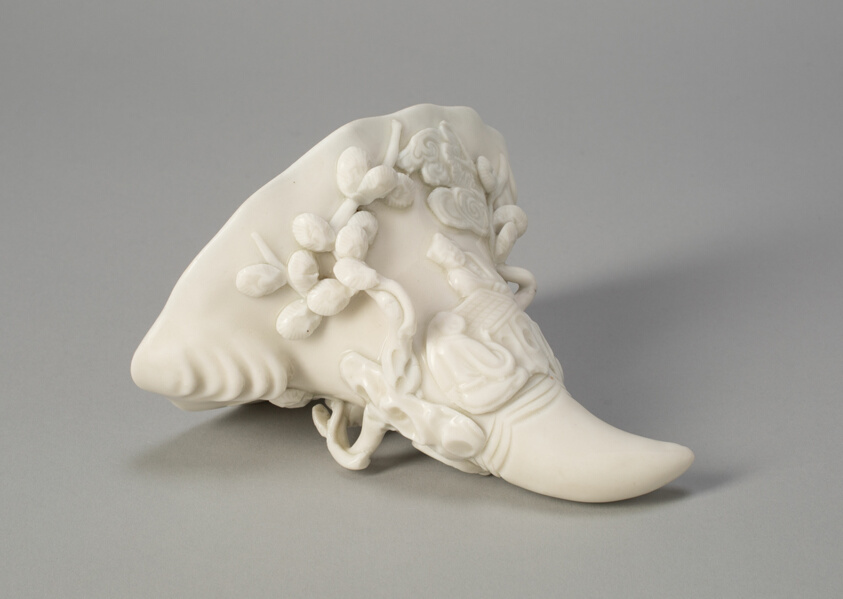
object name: Vessel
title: Rhinocerous Horn-Shaped Cup with Figures by a Tree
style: Chinese (culture or style)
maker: China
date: Ming dynasty (1368–1644)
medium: Dehua ware (blanc de chine); glazed porcelain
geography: China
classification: drinking vessel; porcelain; asian art; ceramics; vessel